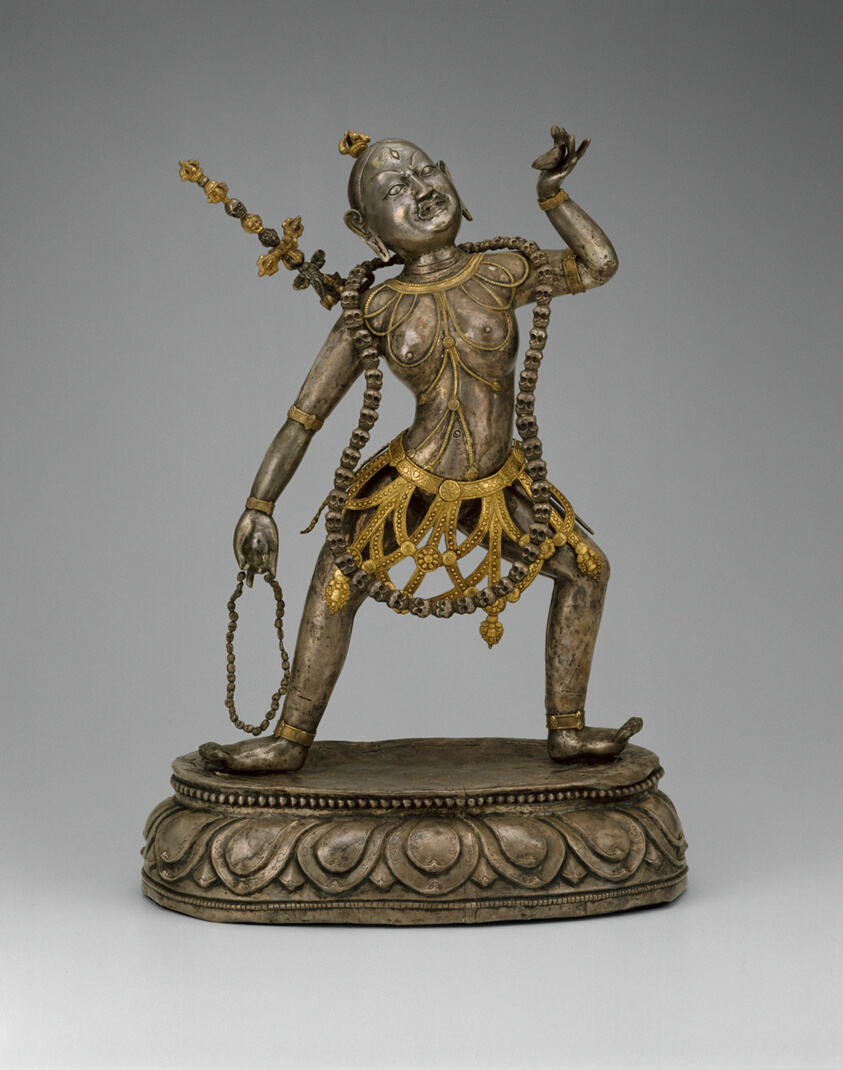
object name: Sculpture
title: Tantric Female Enlightened Being (Vajrayogini) Holding a Skull Cup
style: Himalayan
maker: Tibet; Central Tibet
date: 18th century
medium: Silver, gilt silver, and gilt copper alloy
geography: Tibet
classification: sculpture; silver; metal; asian art